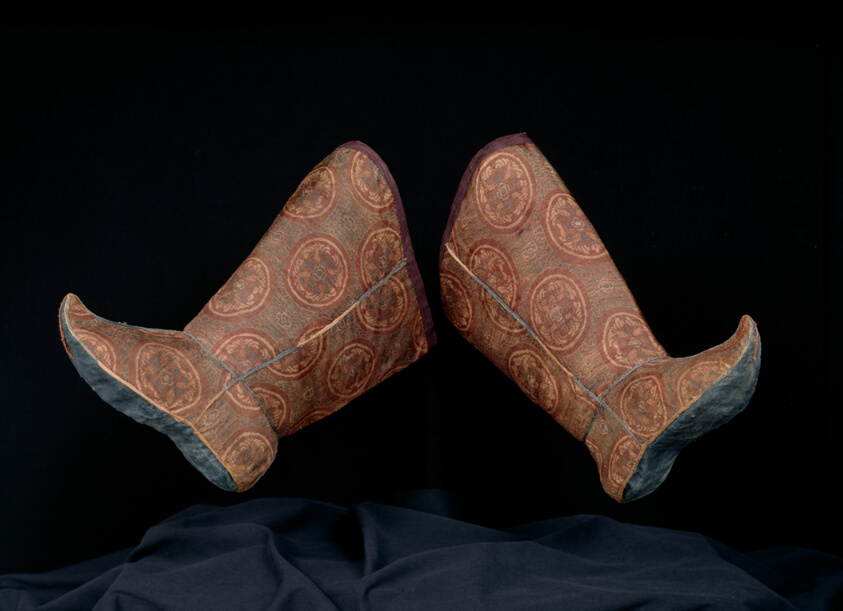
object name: Costume and Accessories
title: Pair of Woman's Boots with Tying Ribbon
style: liao, Chinese (culture or style), East Asian, asian, song, tang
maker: China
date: Tang dynasty(618–906)/ Song dynasty(960–1279), 10th/11th century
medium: Outer boot: silk, complementary weft twill weave with inner warps; seam trim cord: silk, oblique interlacing; ribbon and top boot edge binding: silk, simple and complex gauze weave; lined with silk, plain weave; lining’s upper edge facing: silk, twill damask weave; sole: silk, plain weave; tying ribbon: twill weave self-patterned by areas of twill weave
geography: China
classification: textile; costume accessory - shoe; weaving; costume